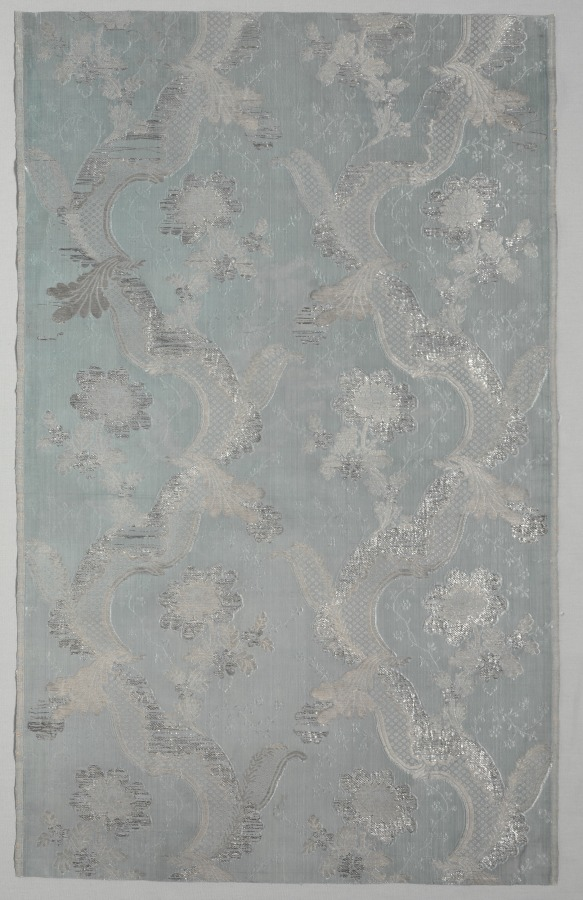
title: Lengths of Textile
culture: France, 18th century, Period of Louis XV (1723-1774)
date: 1723–1774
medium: plain compound cloth, brocaded; silk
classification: Textile